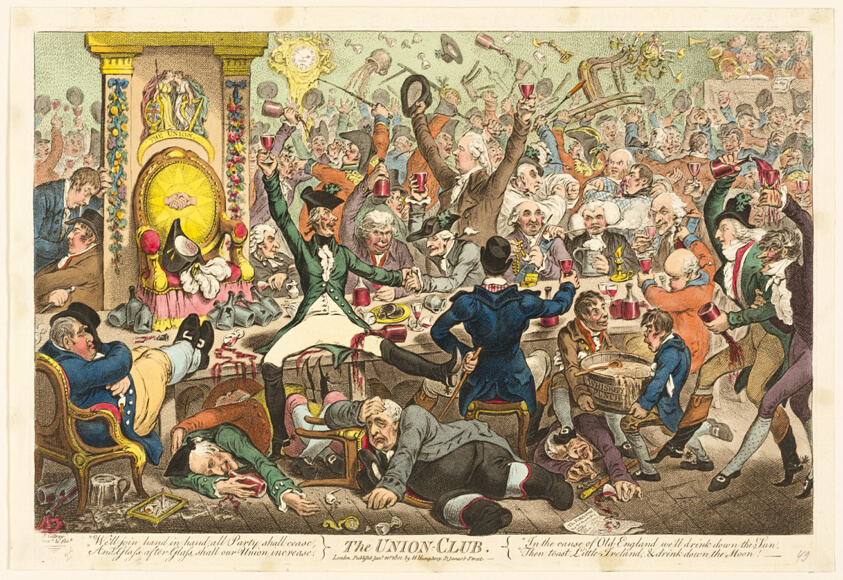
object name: Print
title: The Union Club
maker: James Gillray (English, 1756-1815); published by Hannah Humphrey (English, c. 1745-1818)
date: published January 21, 1801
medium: Hand-colored etching on paper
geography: England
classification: etching; print; prints and drawing